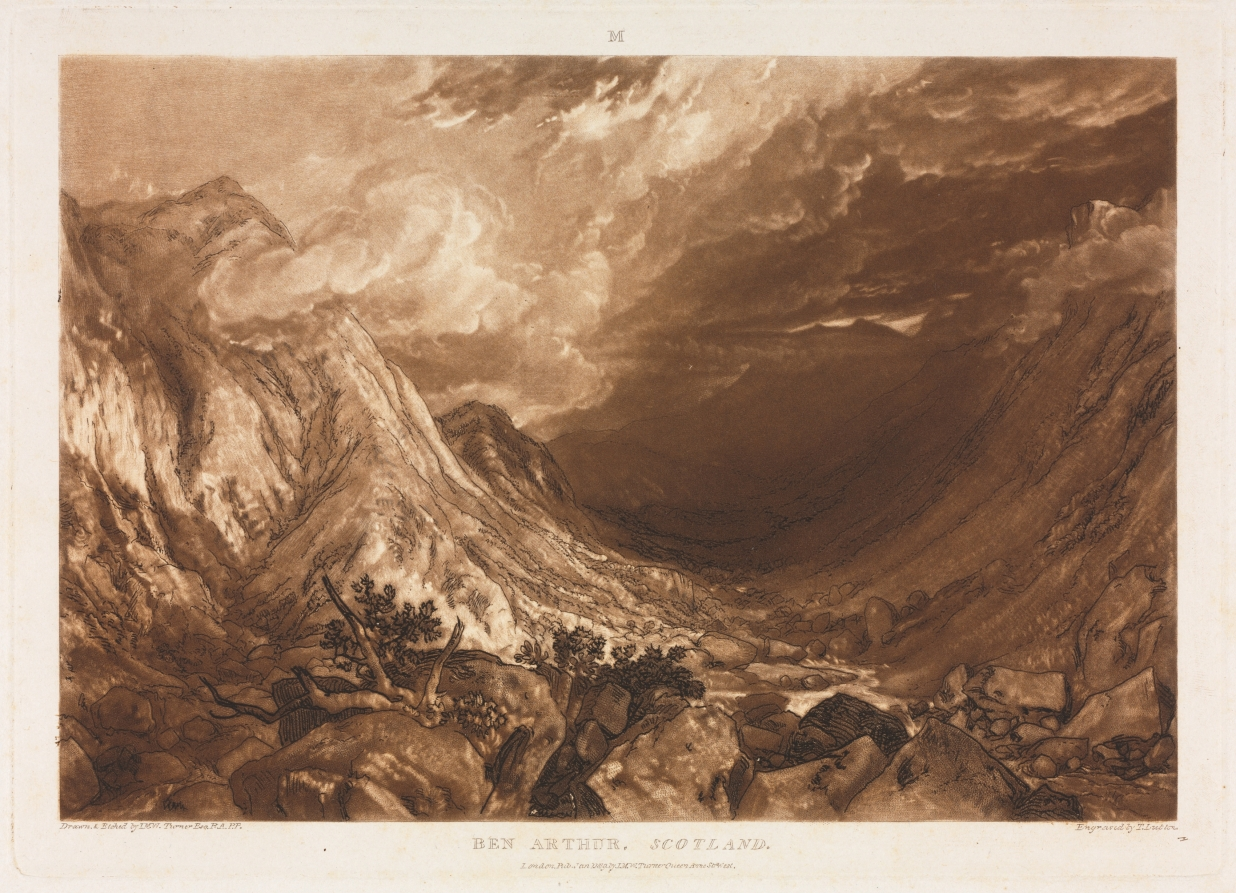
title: Liber Studorium: Ben Arthur, Scotland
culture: England, 19th century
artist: Thomas Guff Lupton (British, 1791–1873)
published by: Drawn, etched, and published by Joseph Mallord William Turner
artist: after Joseph Mallord William Turner (British, 1775–1851)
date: c. 1818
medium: etching and mezzotint in brown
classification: Print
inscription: Inscribed on plate, below image: "Drawn & Etched by JMW Turner Esq. R.A.P.P. BEN ARTHUR, SCOTLAND London. Pub. Jan 1 1819 by J.M.W. Turner Queen Anne St West, Engraved by T. Lupton"